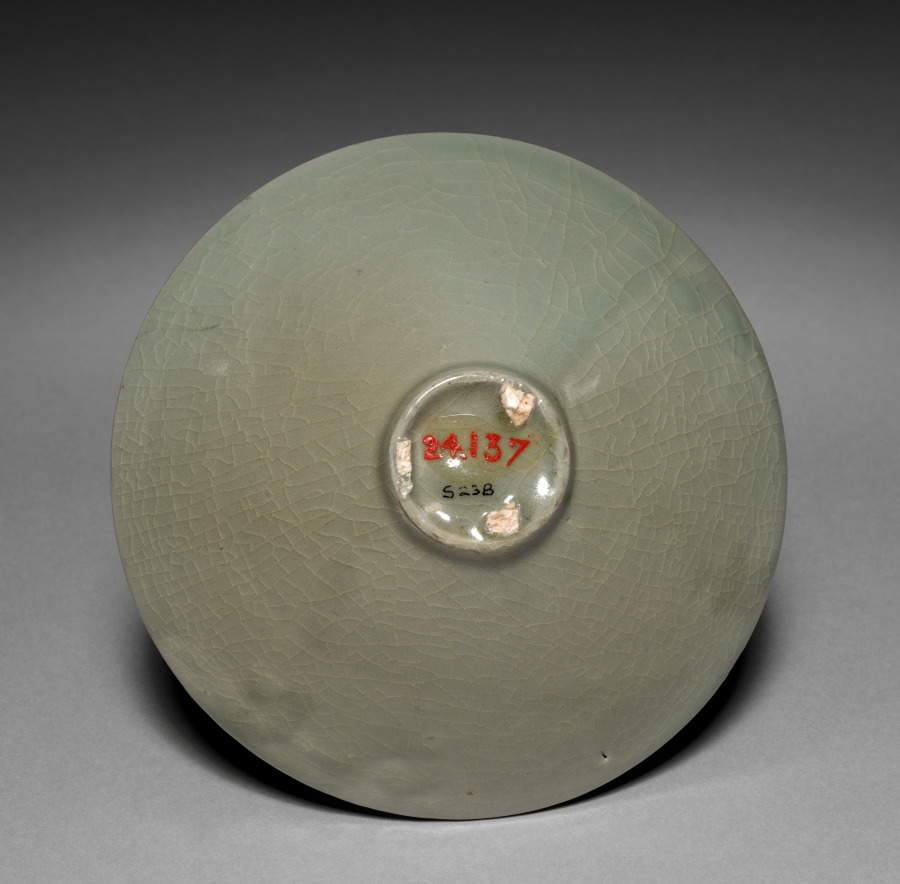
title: Bowl with Cloud Design in Relief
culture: Korea, Goryeo dynasty (918–1392)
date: 1100s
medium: glazed porcelain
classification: Ceramic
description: As early as the 600s, the practice of drinking tea and wine became an important part of elite leisure culture in Korea. A wide bowl like this example was especially suitable for drinking powdered tea shaved from a compressed tea cake, the most commonly enjoyed type during the Goryeo period. The pale bluish green glaze indicates that this tea bowl was created in the 12th century, the time when the production of celadon reached its technical peak.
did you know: Kangjin and Buan kilns in Jeolla province were the two major production centers for celadon wares during the Goryeo period (918–1392).